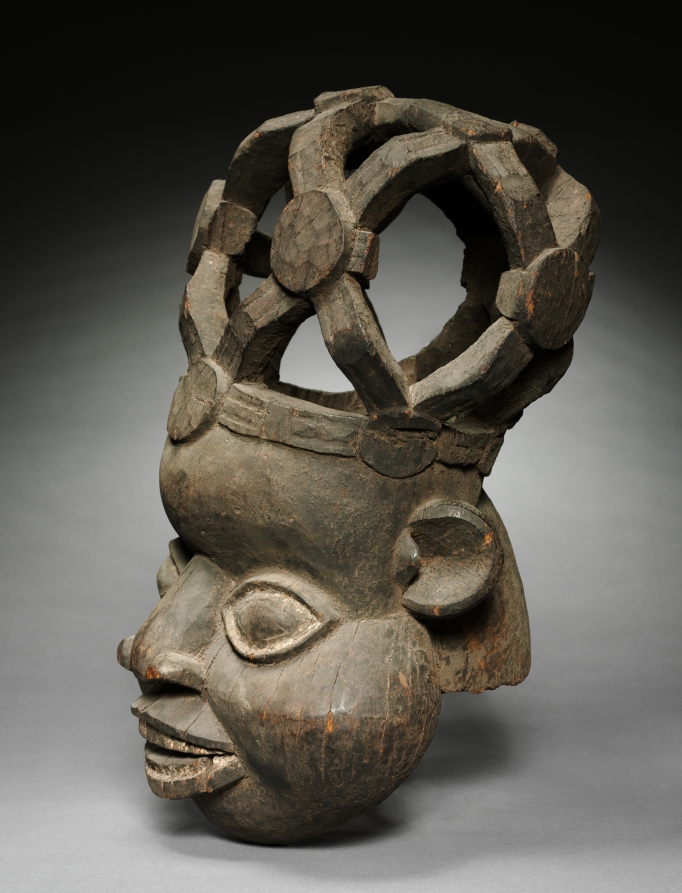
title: Helmet Mask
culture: Africa, Central Africa, Cameroon, Bamum Kingdom, Bamum-style maker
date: c. 1900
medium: Wood, kaolin, and organic materials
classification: Mask